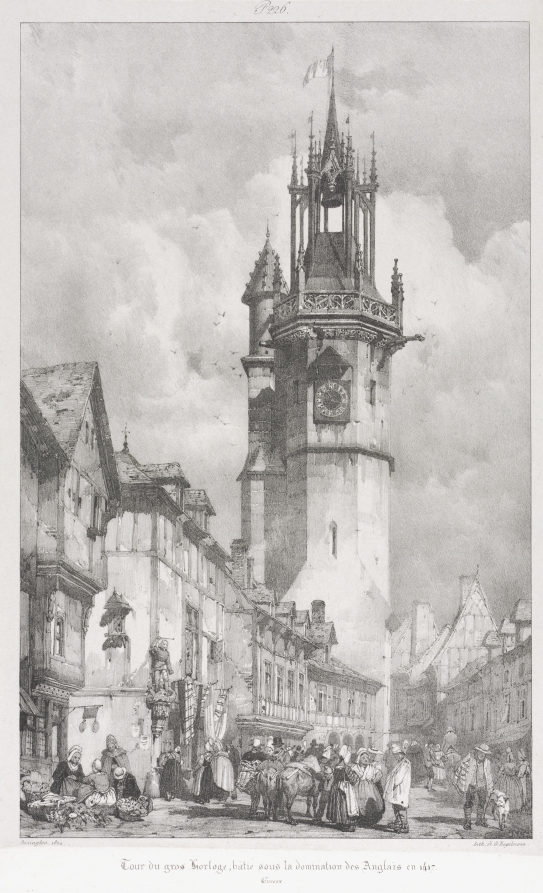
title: Voyages Pittoresques et Romantique dans l'Ancienne France, Normandie: Tour du Gros-Horlage, Évreux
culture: France, 19th century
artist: Godefroy Engelmann (French, 1788–1839)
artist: after Richard Parkes Bonington (British, 1802–1828)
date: 1824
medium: lithograph tipped in to mount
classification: Print